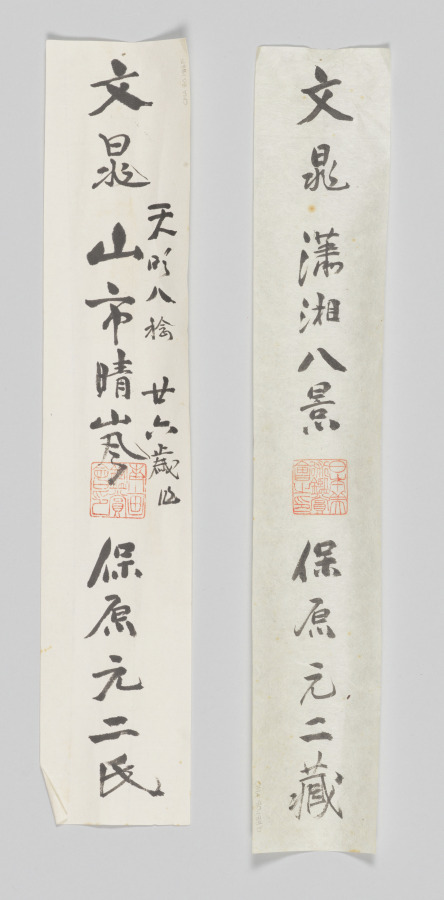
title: Mountain Market in Clearing Mist, from Eight Views of Xiao-Xiang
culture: Japan, Edo period (1615–1868)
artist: Tani Bunchō (Japanese, 1763–1841)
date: 1788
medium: album leaf remounted as a hanging scroll; ink and color on paper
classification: Painting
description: This painting was part of a set of album leaves representing the Eight Views of Xiao-Xiang, a theme originating in Chinese poetry and painting that spread to both Korea and Japan. Southern China’s Xiao-Xiang area, where the mist-covered banks of the Xiang River created a complex landscape shifting like the moods and minds of people, captured the imaginations of generations of painters and calligraphers. Inscriptions on these works suggest that they were possibly ordered by newly prominent Japanese Confucian scholars.